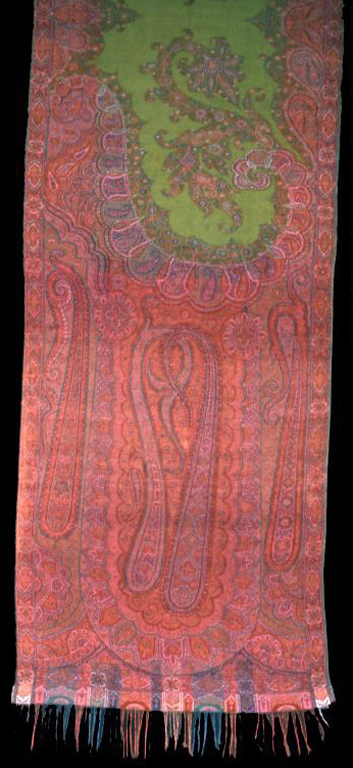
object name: Textile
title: Burnoose, Narrow Shawl, or Scarf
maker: France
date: c. 1862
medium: Silk and wool, warp threads dyed in multiple colors prior to weaving; center of weft-float faced 1:3 'Z' twill weave; patterned areas of weft-float faced 3:1 twill weave with supplementary patterning wefts bound in weft-float faced 1:3 'Z' twill interlacings over warp-float faced twill weave; main warp fringe; woven on loom with Jacquard attachment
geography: France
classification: textile; weaving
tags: fashion